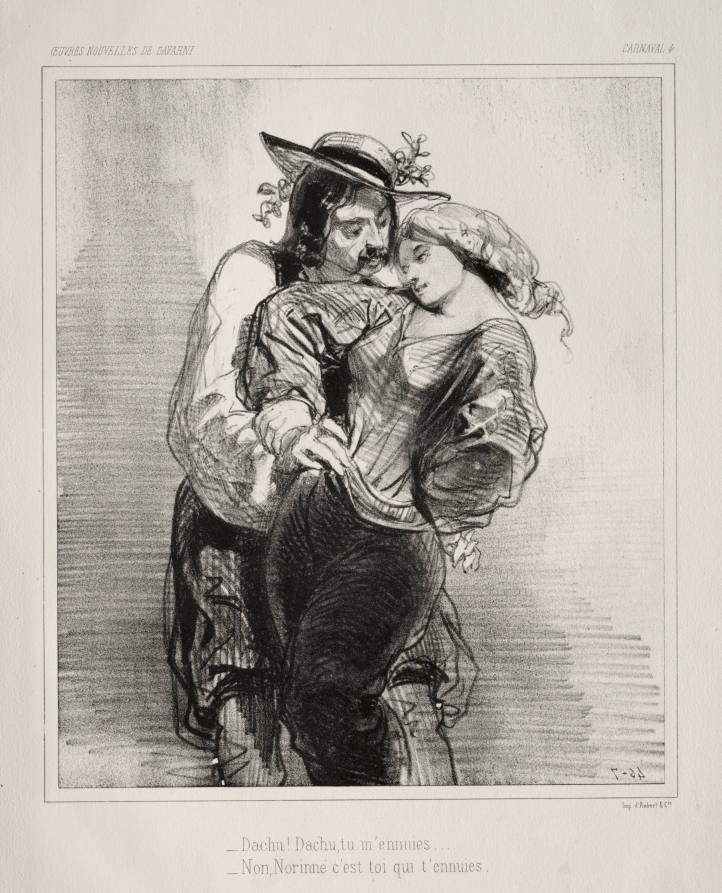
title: Carnaval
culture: France, 19th century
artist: Paul Gavarni (French, 1804–1866)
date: c. 1841–47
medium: lithograph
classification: Print